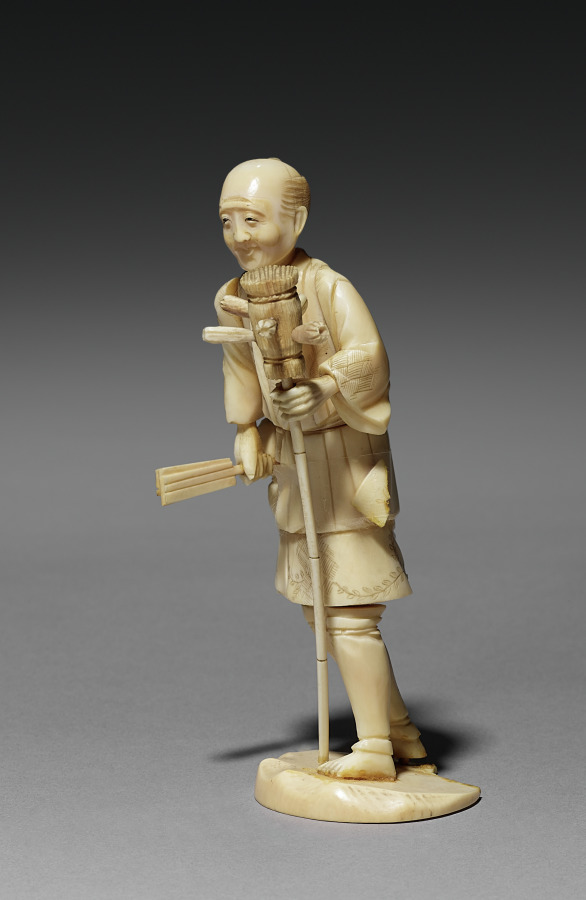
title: Man Holding a Standard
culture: Japan, Meiji period (1868–1912)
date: late 1800s-early 1900s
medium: ivory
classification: Ivory